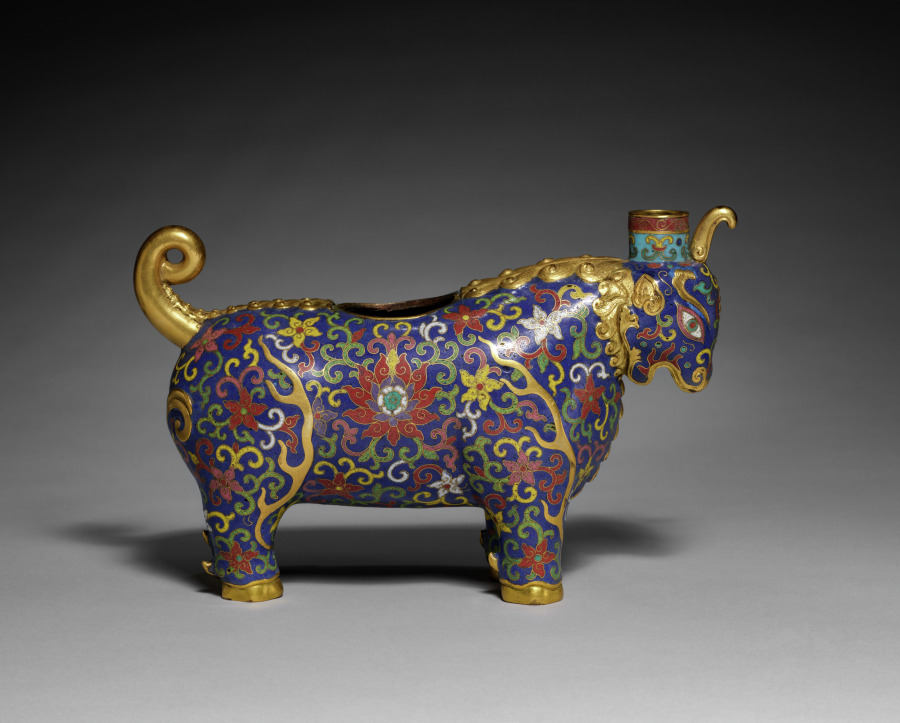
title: Container in the Form of a Unicorn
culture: China, Qing dynasty (1644-1911), Qianlong mark and reign (1736-95)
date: 1736–95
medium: cloisonné enamel and gilt copper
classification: Enamel